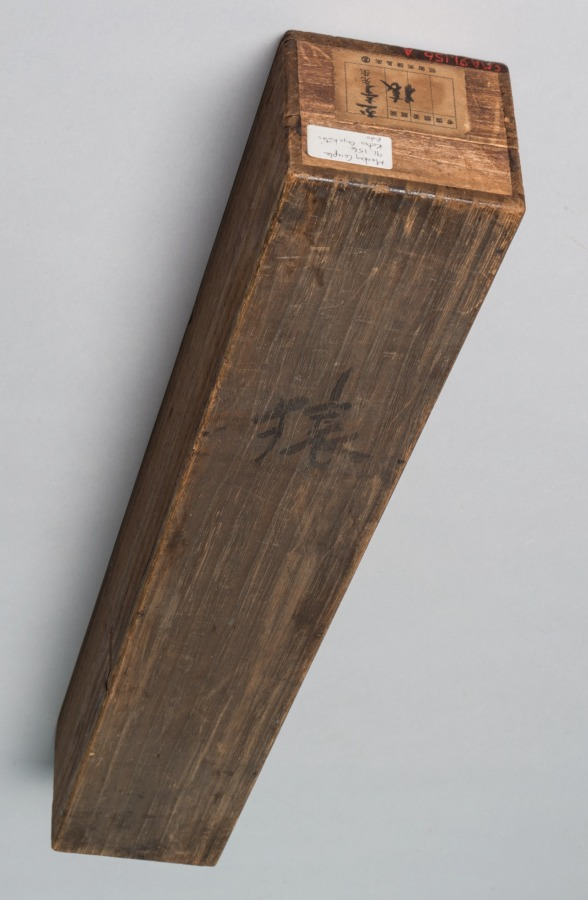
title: Monkeys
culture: Japan, Edo period (1615–1868)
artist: Gyokutei Katsu (Japanese)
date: c. 1800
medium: hanging scroll; ink on paper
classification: Painting